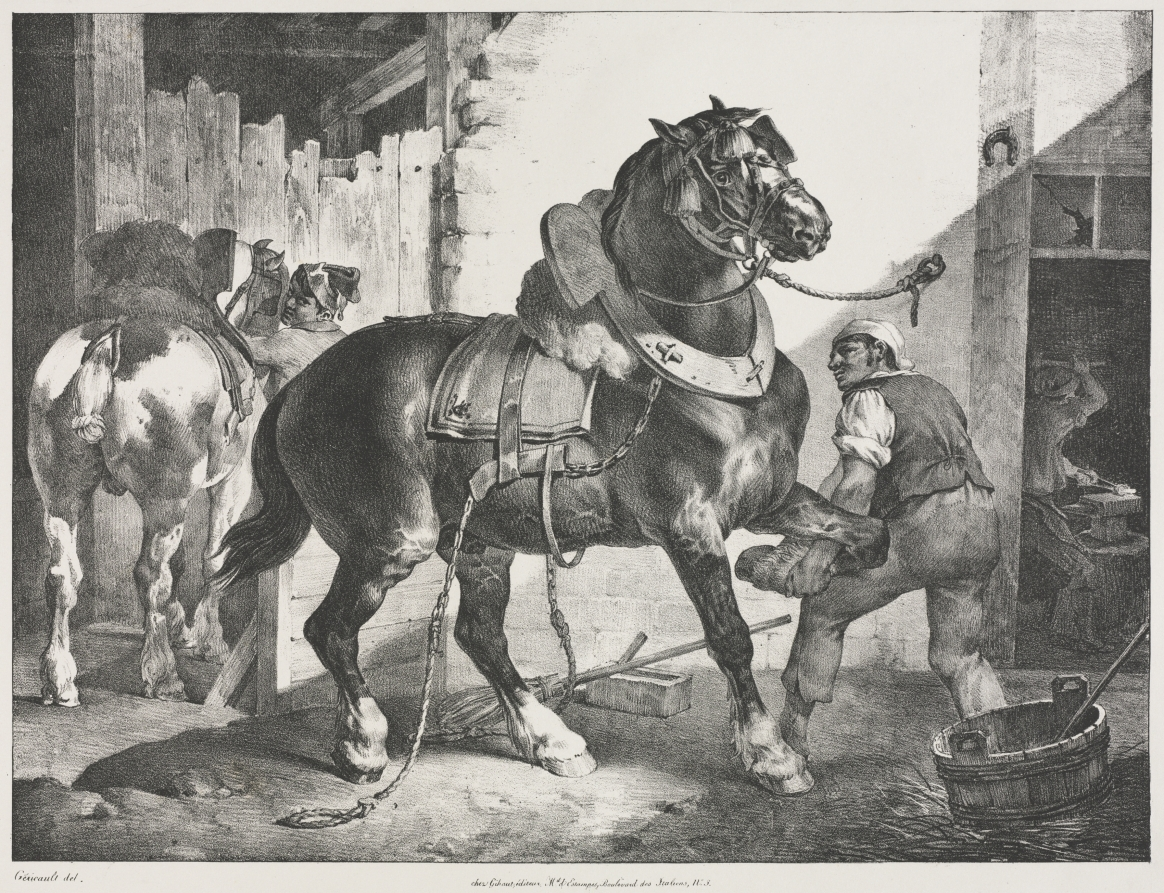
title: The French Blacksmith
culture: France, 19th century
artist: Théodore Géricault (French, 1791–1824)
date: 1822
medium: lithograph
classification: Print